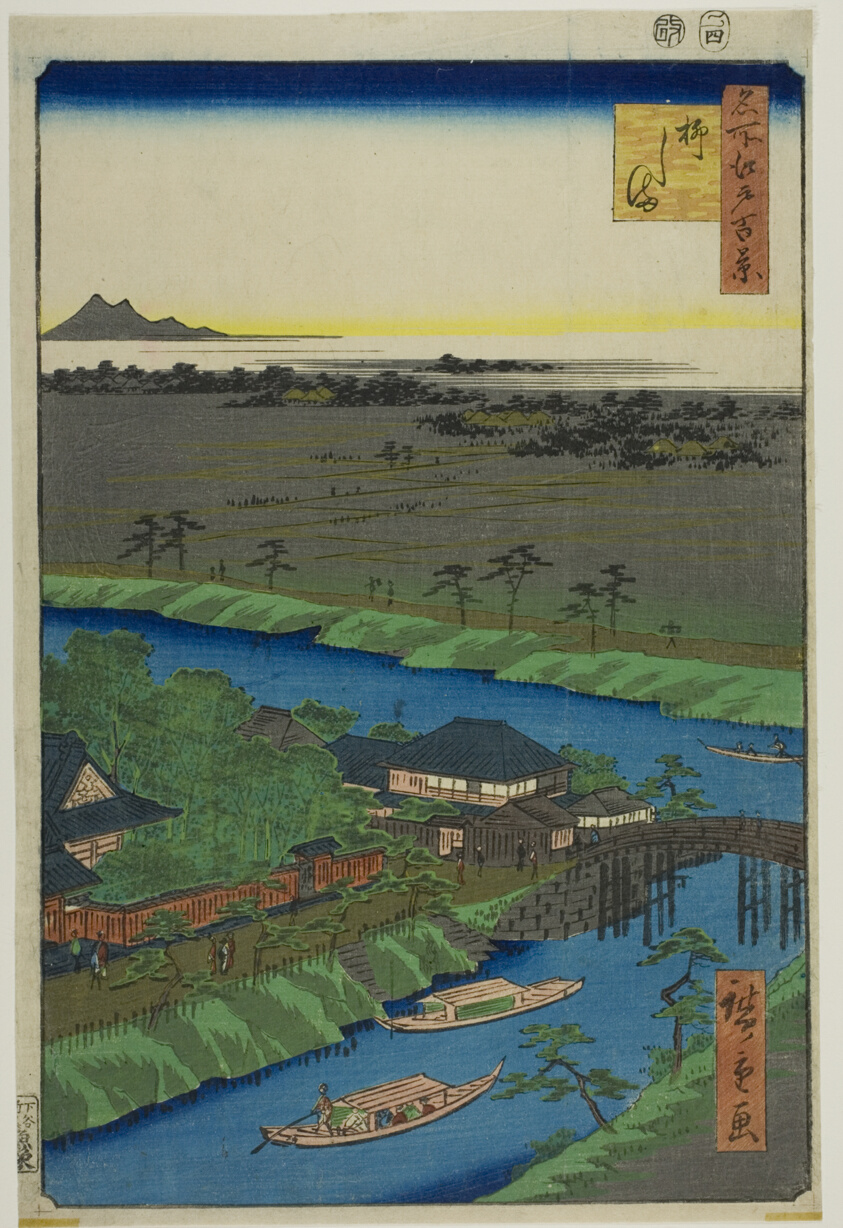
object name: Print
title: Yanagashima, from the series “One Hundred Famous Views of Edo (Meisho Edo hyakkei)”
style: Japanese (culture or style)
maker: Utagawa Hiroshige 歌川 広重; Japanese, 1797–1858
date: 1857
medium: Color woodblock print; oban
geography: Japan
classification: woodblock print; print